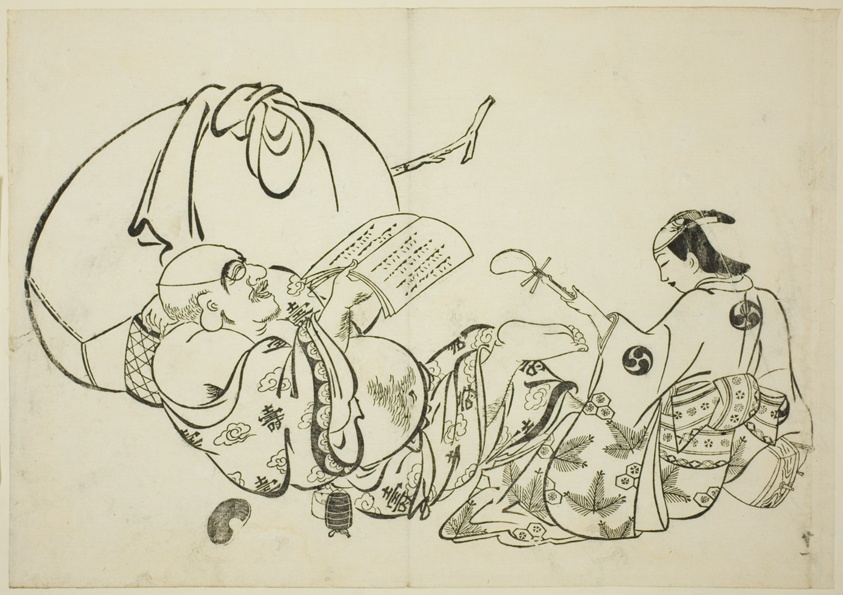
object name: Print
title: Hotei Reading a Book, no. 11 from a series of 12 prints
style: Japanese (culture or style)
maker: Okumura Masanobu (Japanese, 1686-1764)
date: c. 1708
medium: Woodblock print; oban, sumizuri-e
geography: Japan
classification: woodblock print; print; asian art; woodblock